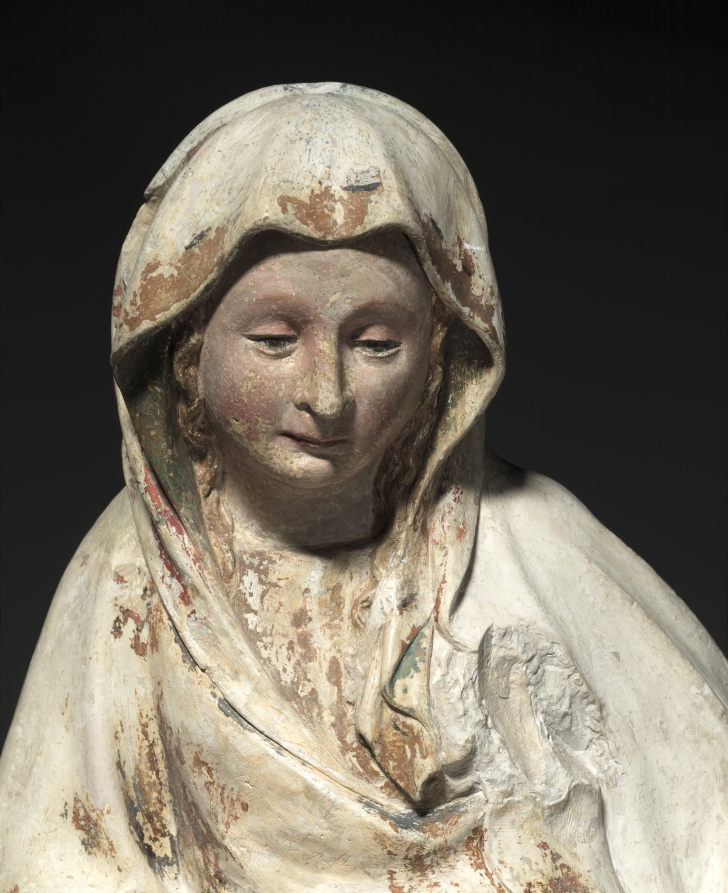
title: Standing Virgin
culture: Netherlands, active Dijon, 15th century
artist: follower of Claus de Werve (Netherlandish, 1380–1439)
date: c. 1440–1450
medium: painted and gilded limestone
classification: Sculpture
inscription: inscriptions on reverse.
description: This standing Virgin now lacks the child she once cradled in her left arm. The sculpture may have been damaged in the French Revolution by falling onto its face. It was carved from soft white limestone of a type known to be quarried at Asnières-lès-Dijon, near Champmol. The figure recalls many of the hallmarks of the style of Claus de Werve, a Netherlandish artist active at the court of Burgundy. The Virgin has a sweet, round face that is also smooth and fleshy, her eyelids droop pensively and she is engulfed in rich voluminous draperies that cascade in deep folds. This sculpture should be seen as a charming reflection of de Werve’s many Virgin and Child groups. It was probably carved by a follower closely acquainted with his style.